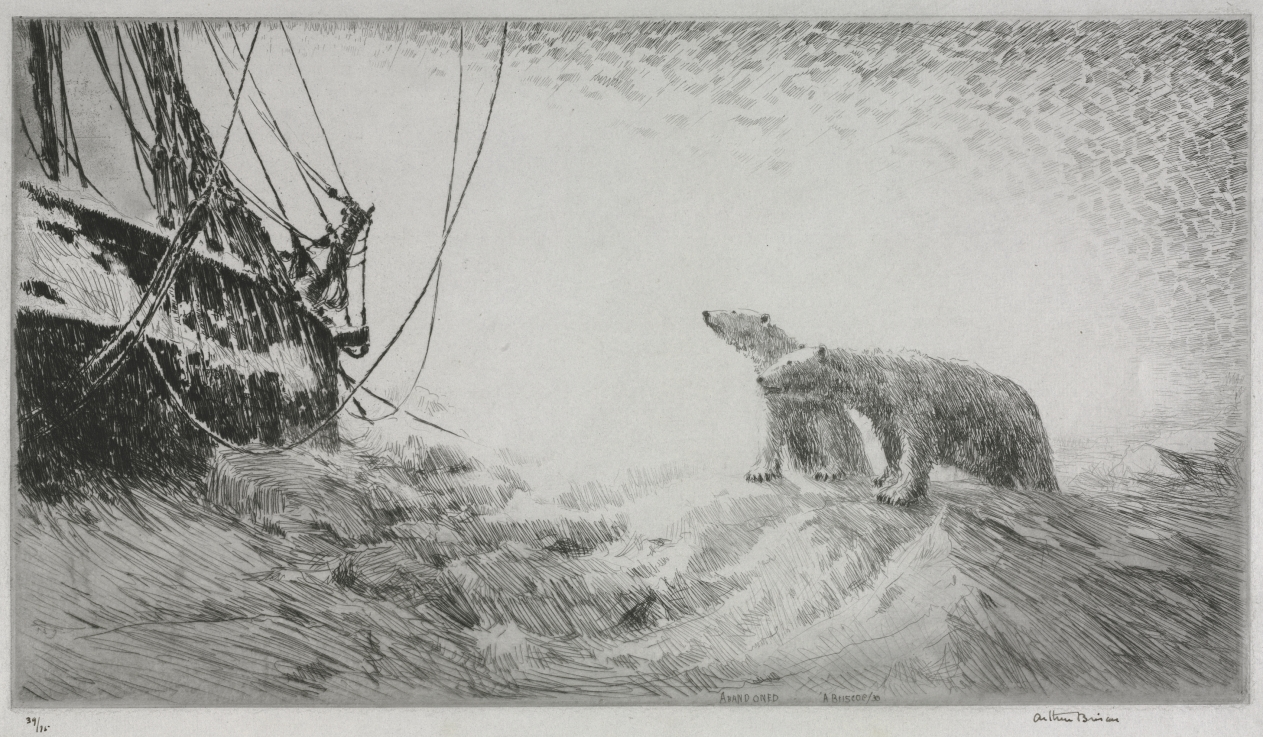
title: Abandoned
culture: England, 20th century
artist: Arthur John Trevor Briscoe (British, 1873–1943)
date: 1930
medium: etching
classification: Print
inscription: Lower margin, in ink: 39/75 Arthur Briscoe